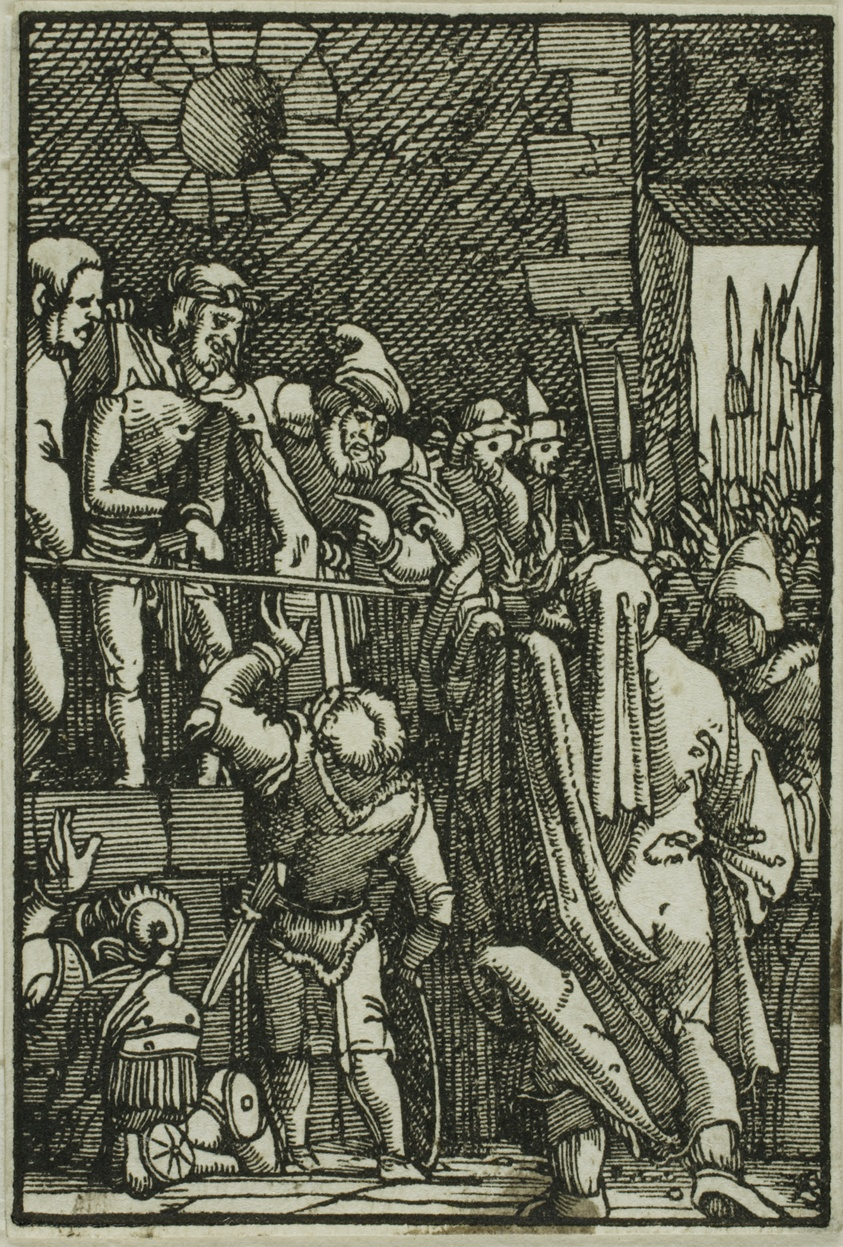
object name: Print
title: Ecce Homo, from The Fall and Redemption of Man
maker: Albrecht Altdorfer (German, c.1480-1538)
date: 1513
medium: Woodcut in black on ivory laid paper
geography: Germany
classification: woodcut; print; prints and drawing